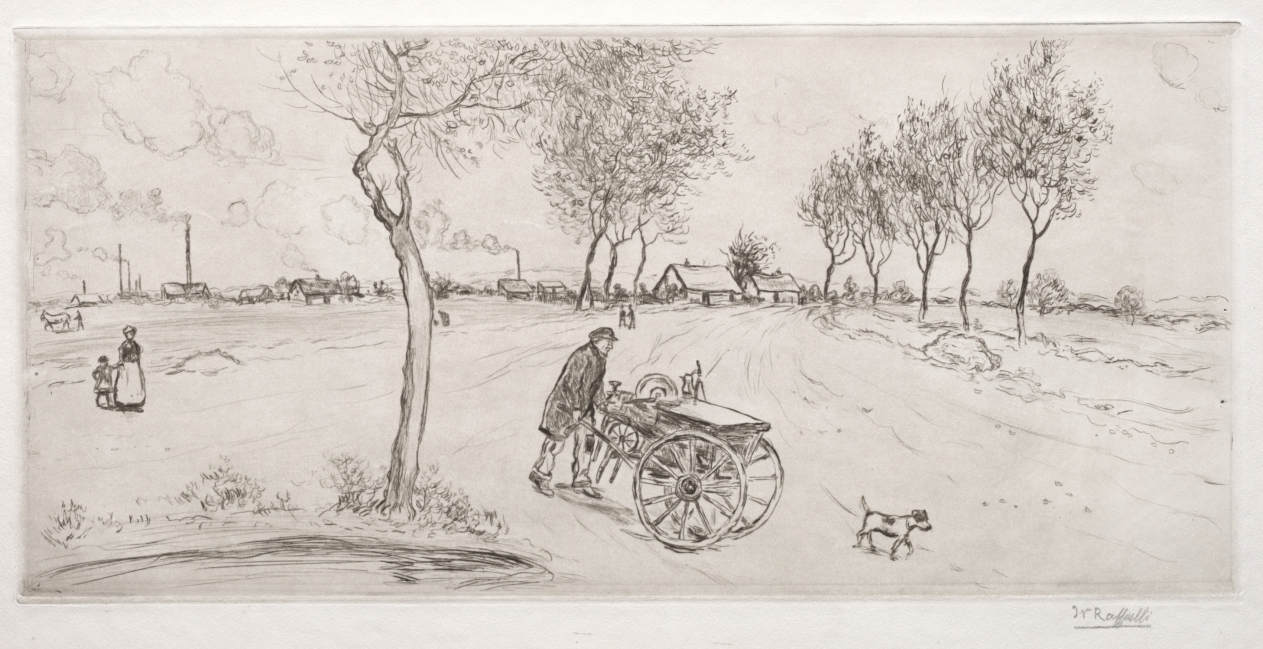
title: The Knifesharpener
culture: France, 20th century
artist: Jean-François Raffaëlli (French, 1850–1924)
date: 1907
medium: drypoint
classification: Print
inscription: Lower right, in graphite, J F Raffaelli